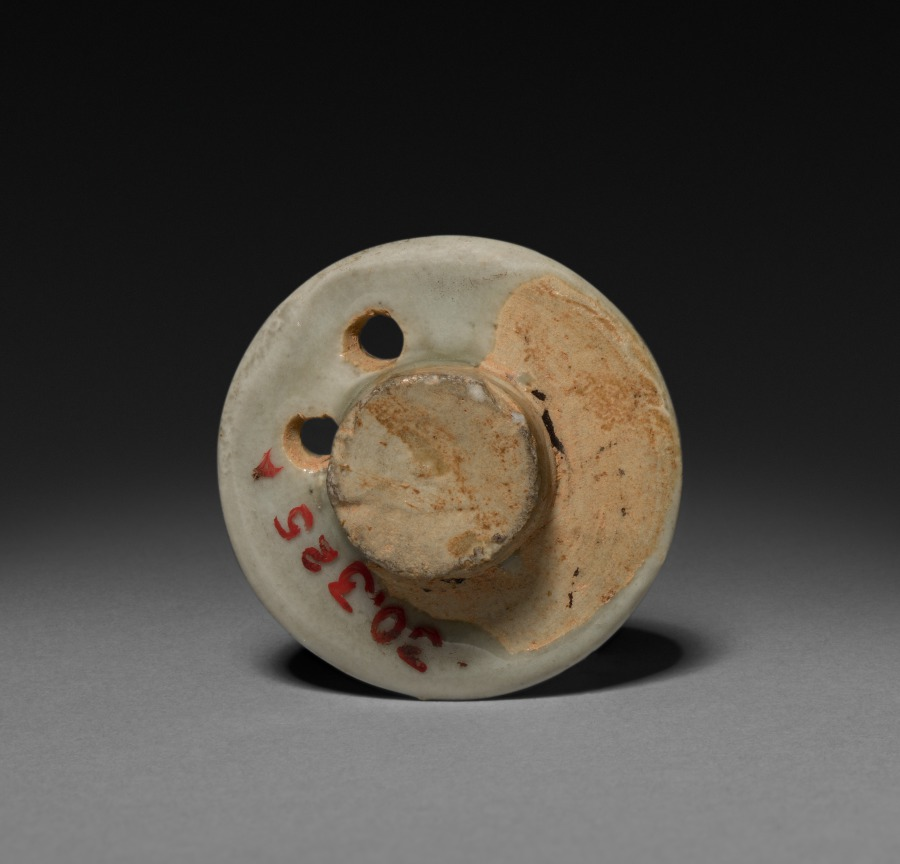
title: Wine Pot: Southern Celadon Ware (lid)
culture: China, Southern Song Dynasty (1127-1279) - Yuan Dynasty (1271-1368)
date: 1200s-1300s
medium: glazed buff stoneware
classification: Ceramic